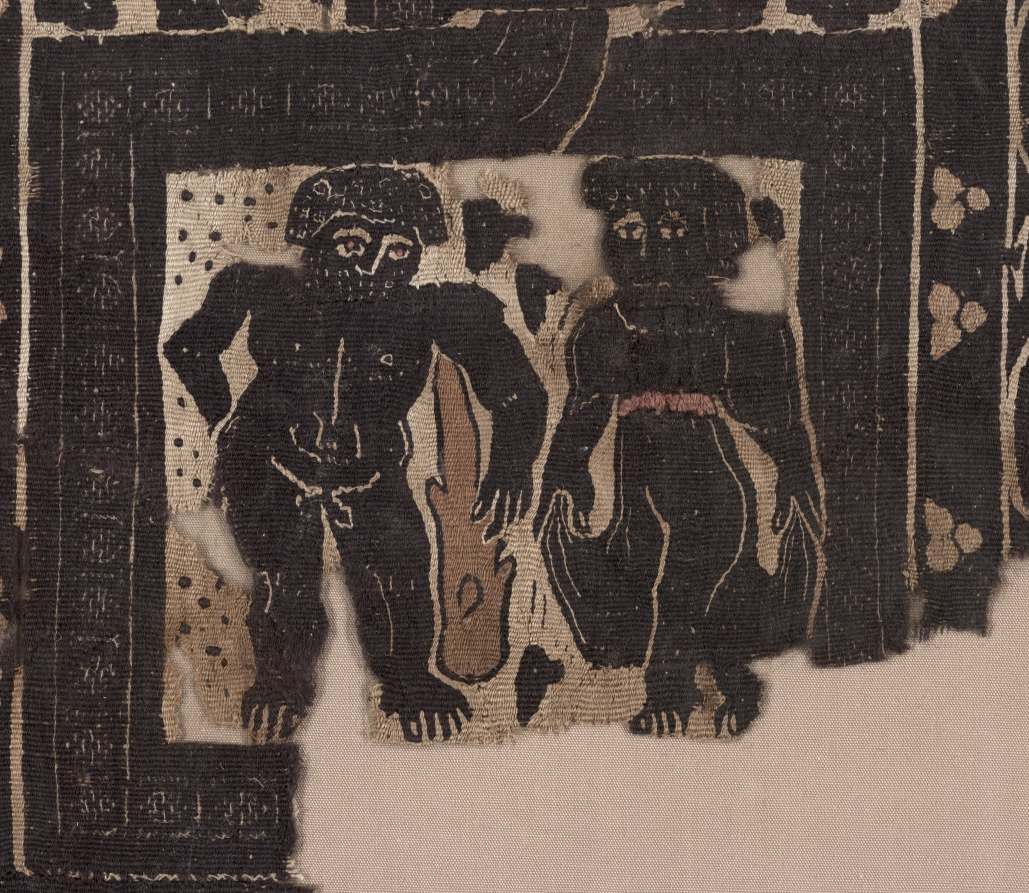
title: Curtain Panel with Scenes of Merrymaking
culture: Egypt, Byzantine period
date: 500s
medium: Linen, undyed; wool: dyed; tapestry weave with supplementary weft wrapping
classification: Textile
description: This large panel conveys merrymaking, wealth, and power through its symbolic imagery and deep purple color. It was originally part of a luxurious wide curtain with similar panels alternating with plain linen panels. Although woven in Christian Egypt, the panel is dominated by pagan subjects. A nude male stands beside a dancing female in transparent clothing in each of the three squares, alternating with centaurs (half-man, half-horse creatures) in roundels. In the central square, Dionysus, the god of wine, holds a grapevine and a weary Hercules leans on his club below. The lively animal imagery conveys wealth because few could afford animals such as lions, bulls, and hares.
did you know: The textile industry drove the Egyptian economy, dominated by the flax plant from which linen is derived.